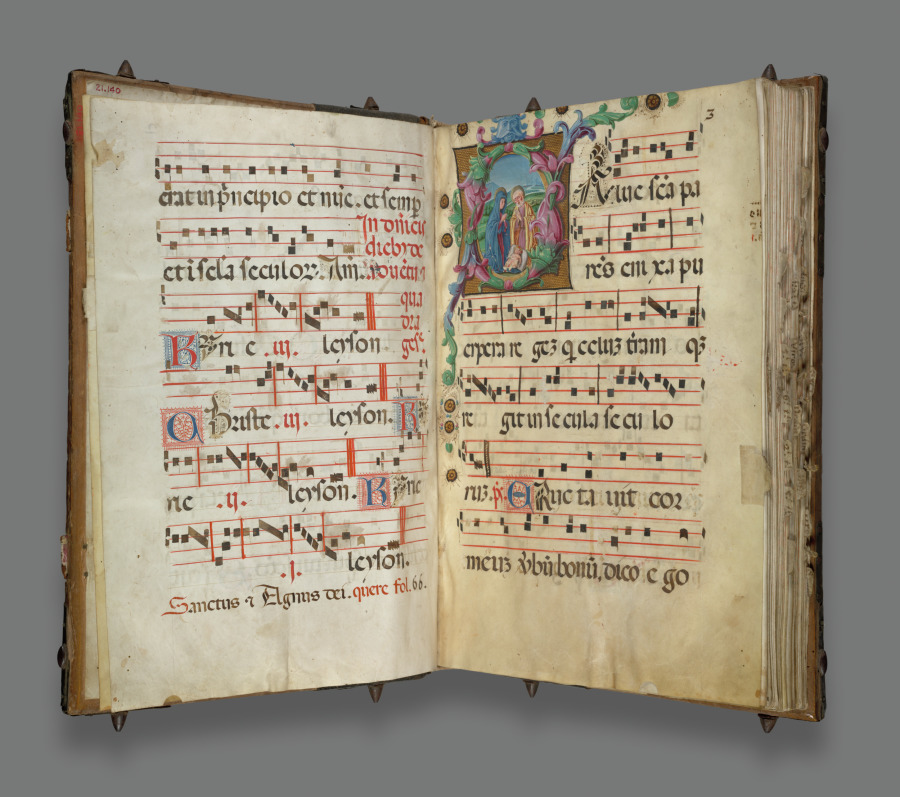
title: Gradual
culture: Italy, Verona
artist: circle of Girolamo dai Libri (Italian, 1474–1555)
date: c. 1520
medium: ink, tempera, and gold on parchment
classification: Manuscript